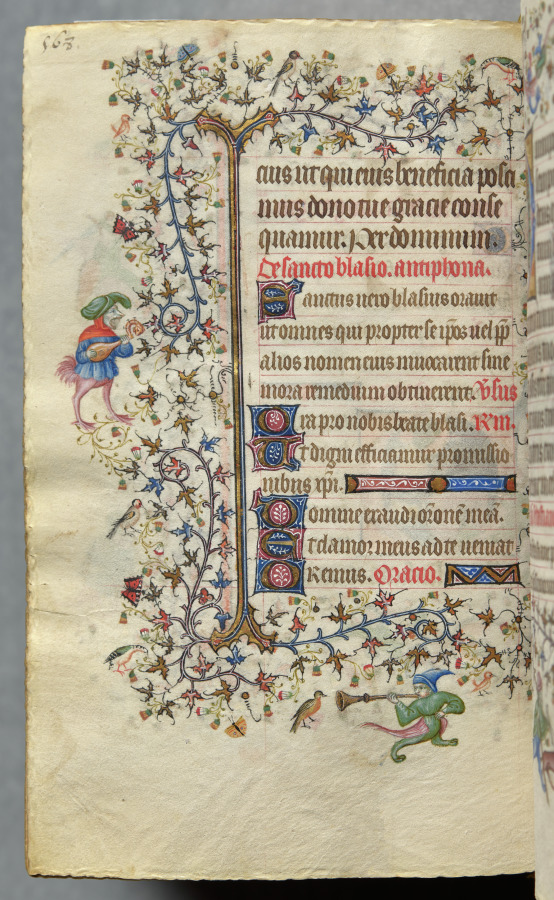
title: Hours of Charles the Noble, King of Navarre (1361-1425): fol. 278v, Text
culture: France, Paris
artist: Master of the Brussels Initials and Associates (French)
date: c. 1405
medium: ink, tempera, and gold on vellum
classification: Bound Volume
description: This precious volume was obviously highly prized by its owner, the French-born King of Navarre, who had his coat of arms painted on no less than twenty folios. Rather than directly commissioning this manuscript from a specific workshop, it seems that Charles the Noble acquired his book of hours -- perhaps ready-made for the luxury market -- while on a trip to Paris in 1404-05. A collaborative effort, six painting styles are evidenced within the pages of this codex, those of two Italians, two Frenchmen, and two Netherlanders. The painter who was responsible for the planning and decoration of the book, and who produced seventeen of the large miniatures, was a Bolognese artist known as the Master of the Brussels Initials. His principal assistant, responsible for most of the borders, was a Florentine who signed his name "Zecho" da Firenze on folio 208 verso.